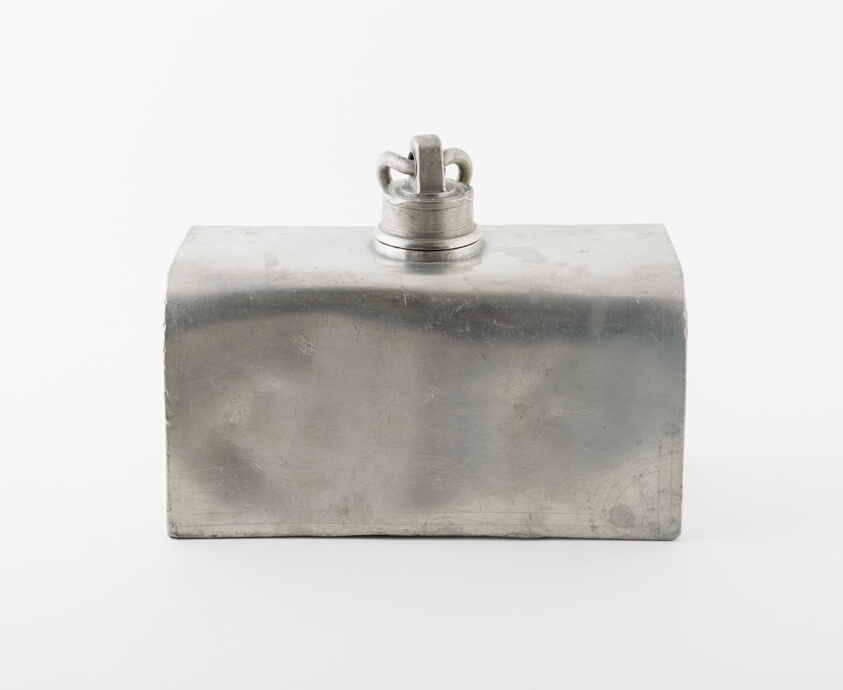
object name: Metalwork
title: Foot Warmer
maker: Jacobus Van Engelen; Dutch, 1789-1848; Netherlands, possibly Hertogenbosch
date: c. 1820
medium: Pewter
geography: Netherlands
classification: pewter; metalwork; european decorative arts